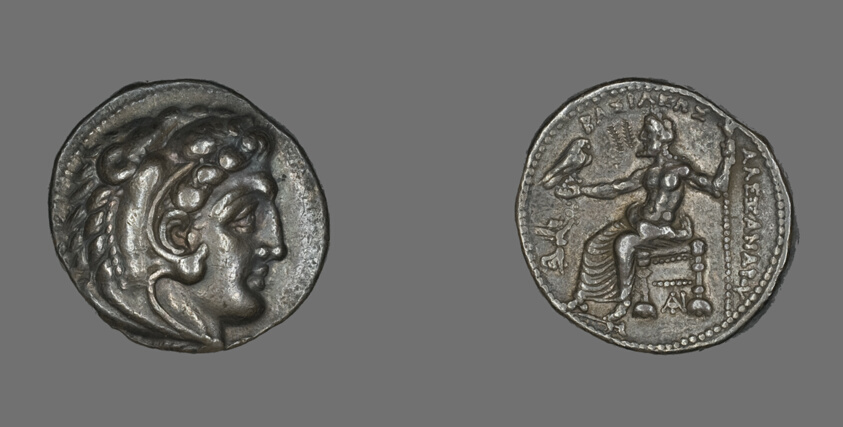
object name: Coin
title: Tetradrachm (Coin) Portraying Alexander the Great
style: greek, ancient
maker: Greek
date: 336-323 BCE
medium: Silver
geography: Roman Empire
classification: coin; ancient art